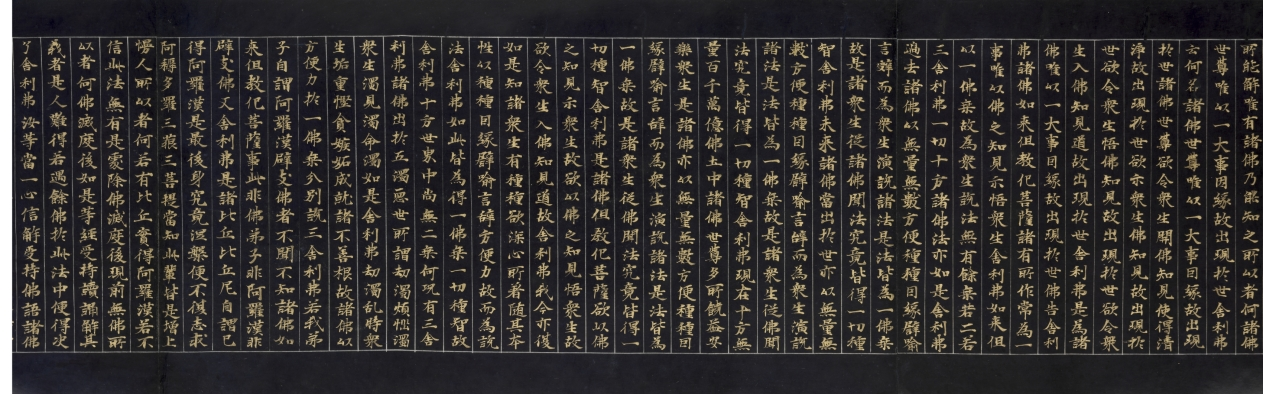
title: Lotus Sutra with a Frontispiece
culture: China, Song dynasty (960–1279)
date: late 1100s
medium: handscroll; gold ink on indigo sutra paper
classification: Painting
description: The frontispiece of this sutra, a sacred Buddhist scripture, illustrates episodes mentioned in the Buddha’s teaching. The sutra begins with a description of the historic Buddha Shakyamuni’s assembly on Vulture Peak. On the right, the Buddha sits amid members of his congregation: lohans (or arhats), bodhisattvas, gods, and other beings. The narrative proceeds from right to left. Heavenly light emanates from Shakyamuni’s brow to “illuminate the eighteen thousand worlds to the east.” Illustrated immediately below the ray is the sutra’s promise that if anyone carves or paints images of the Buddha “they will achieve the Buddha path.” The female figures in the frontispiece point to another promise made in this popular Mahayana school sutra, namely that female devotees and nuns who read the sutra are promised Buddhahood and salvation.